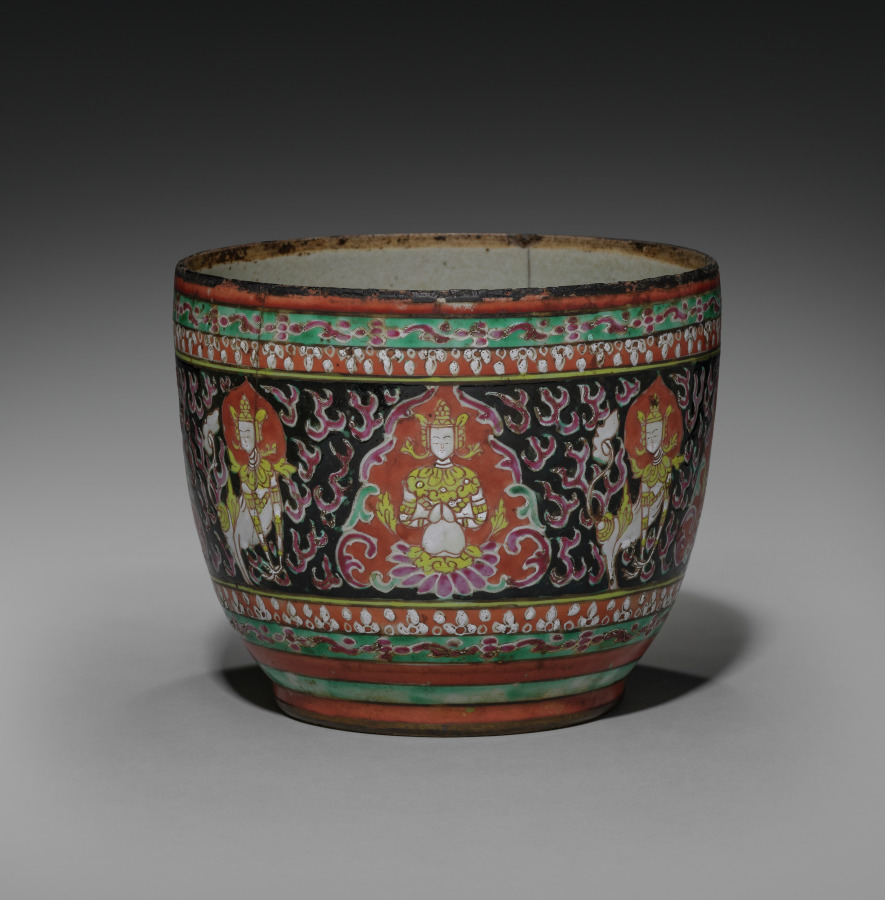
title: Jar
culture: Siam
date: 1800s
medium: porcelain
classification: Ceramic